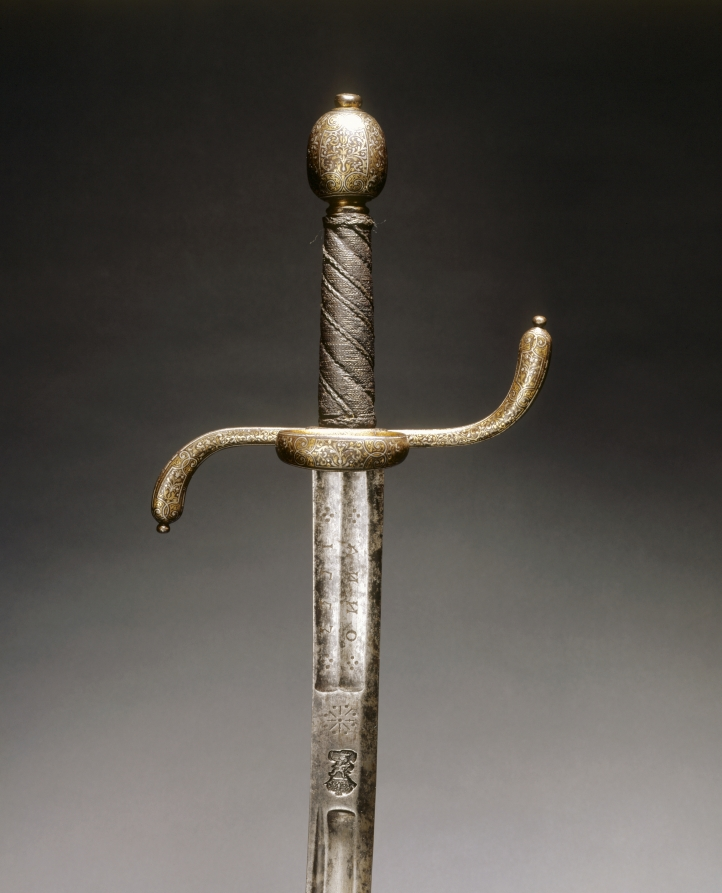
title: Hanger (Hunting Sword)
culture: Hilt: Italy (?); Blade: Germany, Saxony, late 16th-17th Century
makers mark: Jaspar Bongen the Younger (German, active late 1600s)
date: late 1600s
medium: steel; gold and silver damascened hilt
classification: Arms and Armor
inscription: "1553" (Presumed to be a commemorative date)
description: Damascening, the technique of hammering gold and silver wires into grooves cut to receive them, enlivens this sword's hilt. Further texture was added with wires to improve the user's grip, which allowed him to hunt with more control and accuracy. Hunting was a popular sport among the wealthy and many nobles owned tracts of forest, but peasants were prohibited from hunting on these lands.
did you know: The swordsmith's mark, a crowned stag visible on the blade below the hilt, is unidentified.